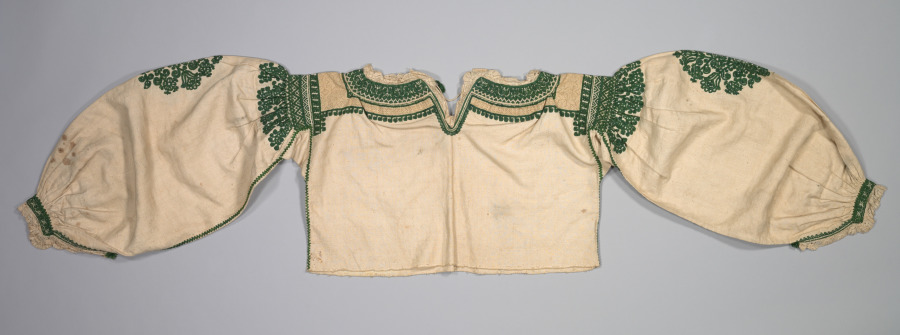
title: Blouse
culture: Spain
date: 1600s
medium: plain weave cotton(?) or linen(?) with embroidery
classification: Garment